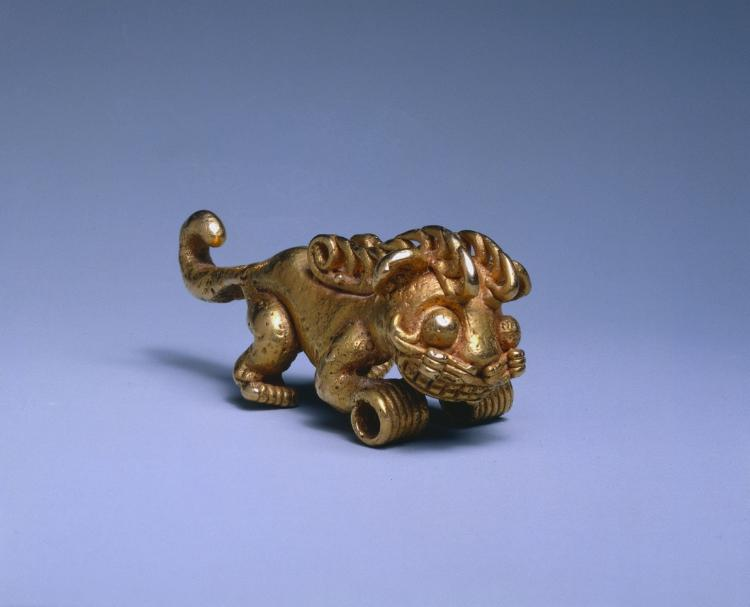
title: Feline Pendant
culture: Panama, Veraguas(?) style, 10th-16th century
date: c. 1000–1550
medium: cast gold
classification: Metalwork